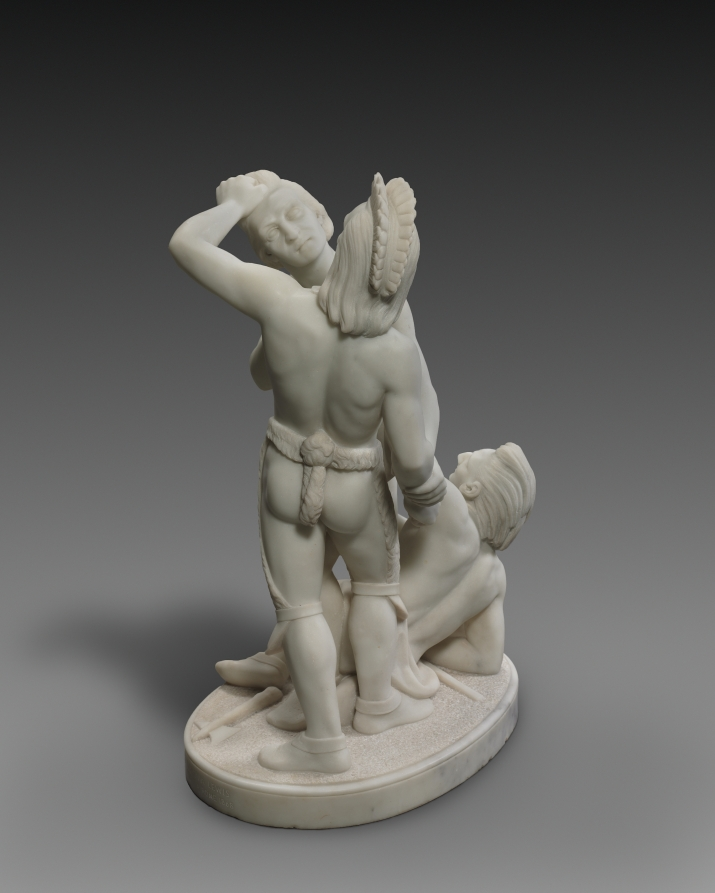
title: Indian Combat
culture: America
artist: Edmonia Lewis (American, c. 1844–1907)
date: 1868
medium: marble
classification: Sculpture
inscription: The base of the sculpture is inscribed: "EDMONIA LEWIS / FECIT A ROME 1868"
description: A spiraling composition with three intertwined figures, Indian Combat ranks as Edmonia Lewis’s most dynamic and complex creation. Although her Native American subjects typically exist in multiple versions, this example appears to be unique. Of Indigenous (Ojibwe) and African American ancestry, Edmonia Lewis studied at Oberlin College and apprenticed with a sculptor in Boston before moving to Rome in 1866. Her sculptures were readily purchased by patrons on both sides of the Atlantic.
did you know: Growing up in her Ojibwe community, Lewis went by a name that translates as "Wildfire."